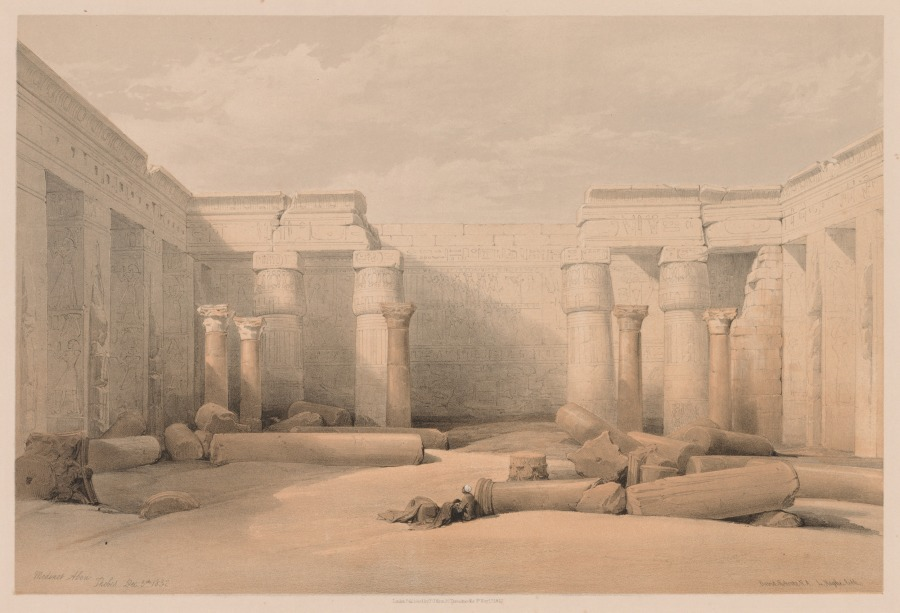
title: Egypt and Nubia: Volume II - No. 18, Medinet Abou, Thebes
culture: England, 19th century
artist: Louis Haghe (British, 1806–1885)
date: 1832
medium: color lithograph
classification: Print